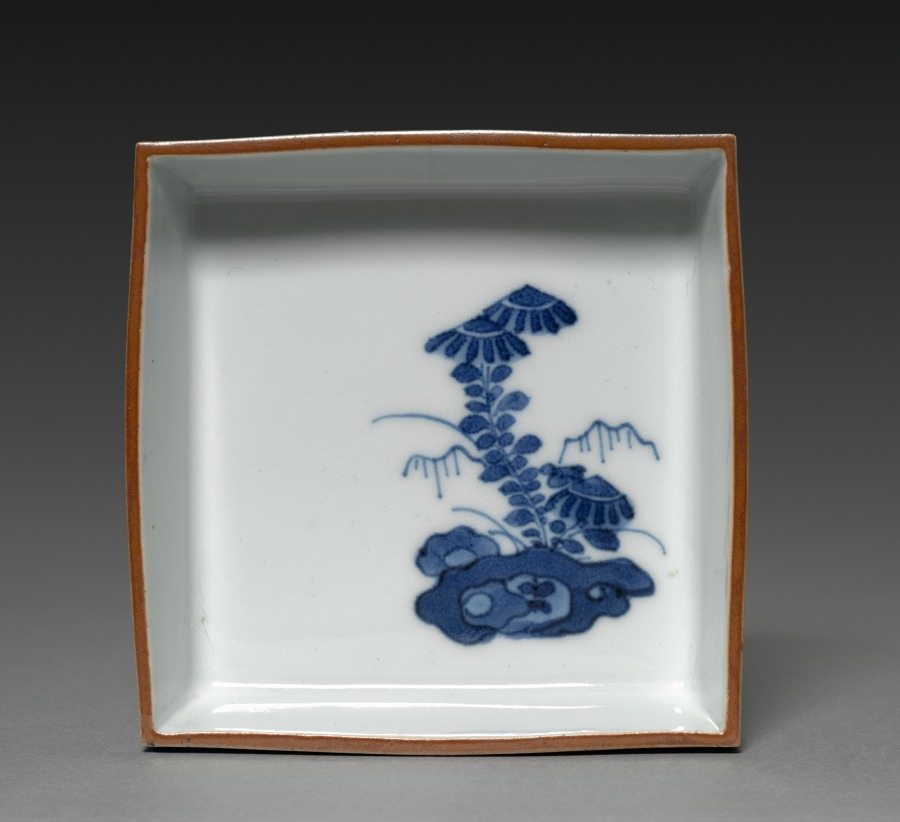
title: Side-Dish with Dandelion in Rocks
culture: Japan, Edo period (1615–1868)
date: 1700s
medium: One of a set of five dishes; porcelain with underglaze blue and overglaze iron oxide (Arita ware, Kutani style)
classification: Ceramic